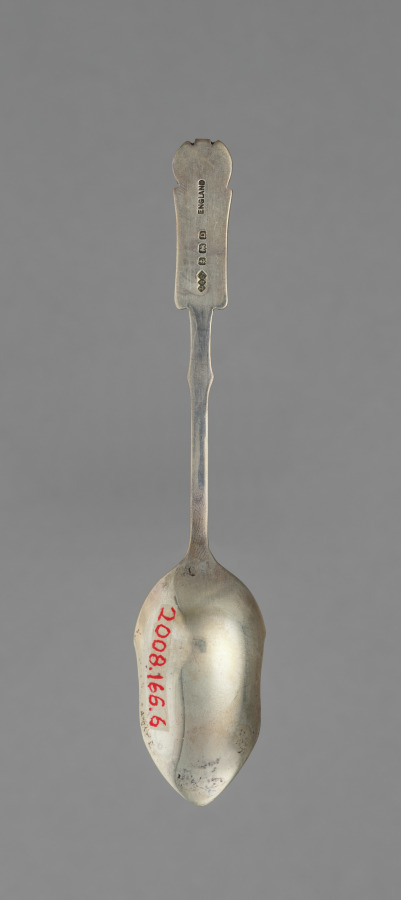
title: Set of six Spoons in Original Box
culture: England, London, 19th century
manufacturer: Liberty and Company (British)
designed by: attributed to Archibald Knox (British, 1864–1933)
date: c. 1895–1910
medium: Silver, enamel decoration and leather box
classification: Silver